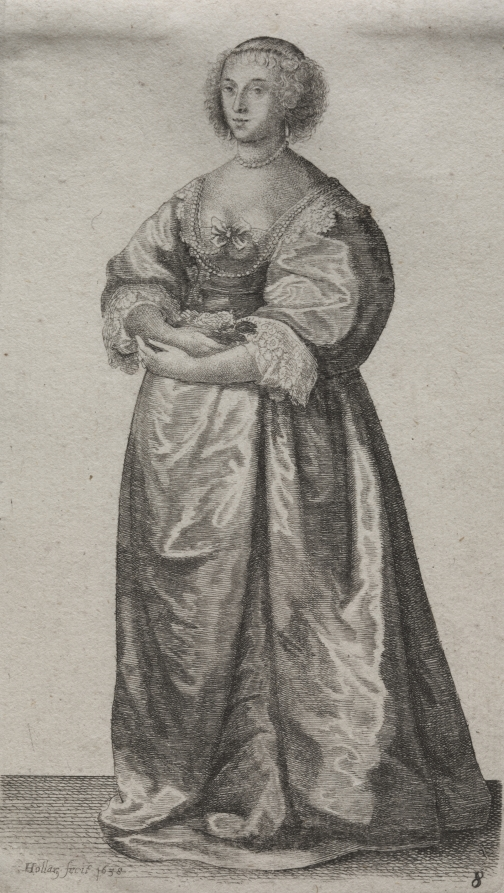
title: The Several Habits of English Women, from the Nobility to the Country Women as they are in these times: The Woman with Flowers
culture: Bohemia, 17th century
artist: Wenceslaus Hollar (Bohemian, 1607–1677)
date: 1638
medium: etching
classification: Print